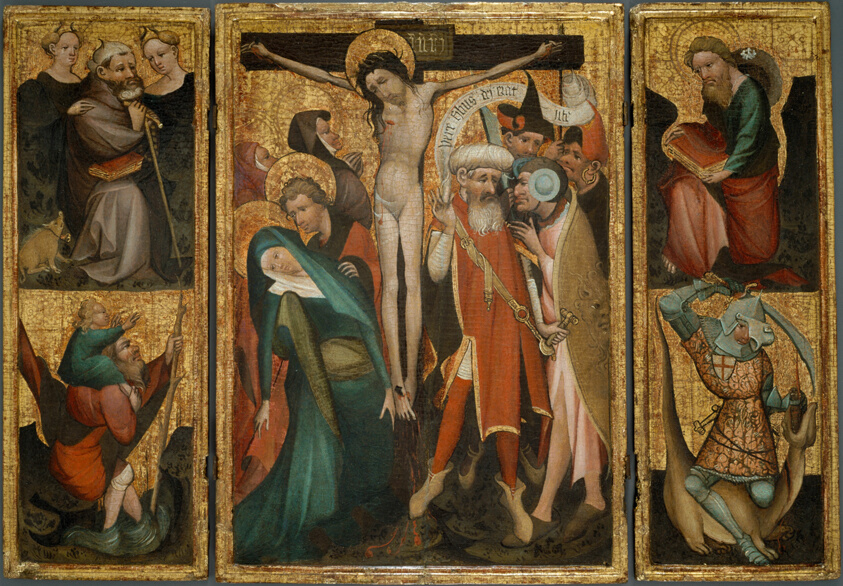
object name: Painting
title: Triptych of the Crucifixion with Saints Anthony, Christopher, James and George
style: 15th century, 14th century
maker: Netherlandish or German; possibly Rhenish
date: c. 1400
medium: Tempera and oil (estimated) on panel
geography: Rhine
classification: painting; german; oil paintings (visual works); paint; european painting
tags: saints, book, children, crucifixions, death, dragon, figures, Jesus, men, river, soldiers, Virgin Mary, women